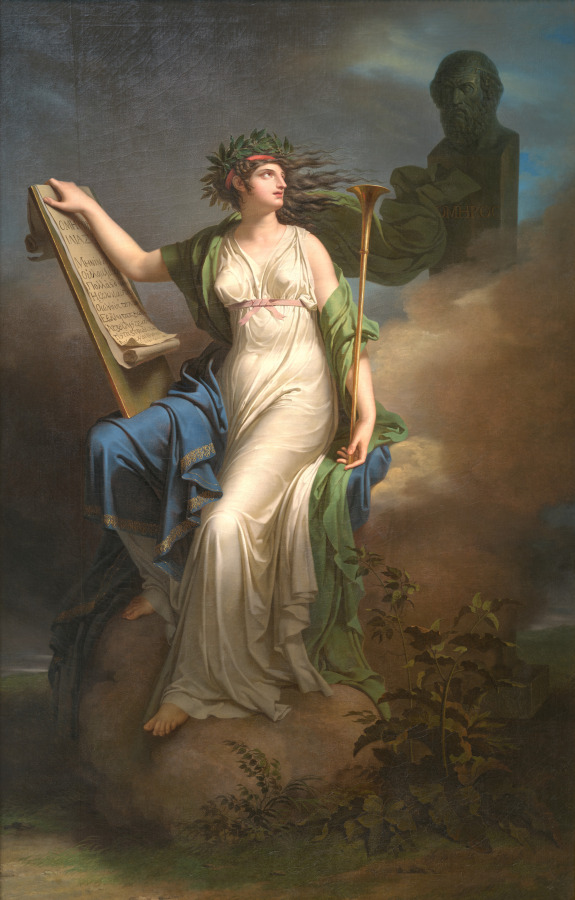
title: Calliope, Muse of Epic Poetry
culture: France, late 18th-early 19th century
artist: Charles Meynier (French, 1768–1832)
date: 1798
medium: oil on canvas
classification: Painting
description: The eldest of the nine Greek muses, Calliope was the goddess of music, song, and dance. She was also known as the goddess of epic poetry and conferred the gift of eloquence on kings and princes. She stands here before a bust of Homer, the ancient Greek poet who wrote the Odyssey and the Iliad. This painting belongs to a cycle of five works commissioned by businessman François Boyer-Fonfréde for his home in Toulouse.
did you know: Through the assistance of his brother, a famous actor of the Comédie Française, Charles Meynier studied in the studio of François André Vincent, the principal rival of the master Jacques-Louis David